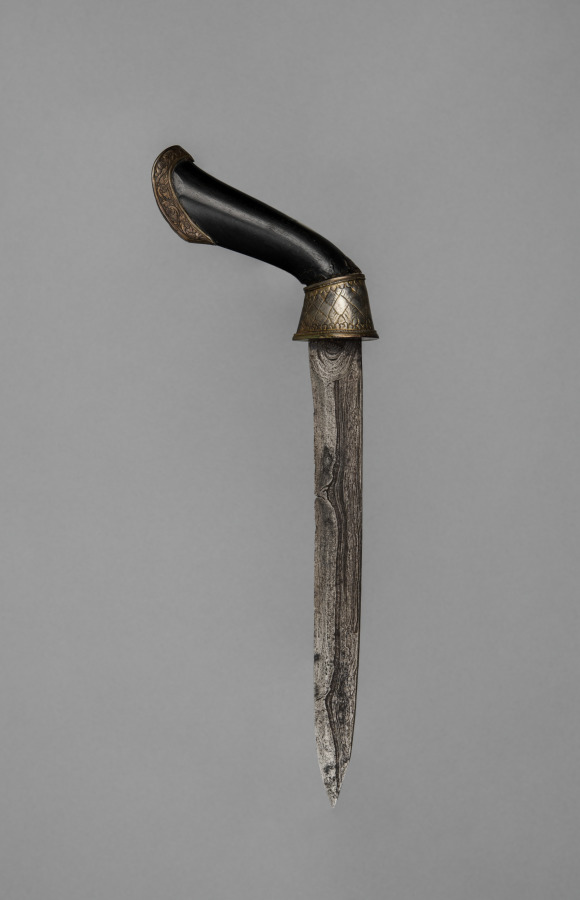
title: Knife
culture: Sri Lanka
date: 1500s–1800s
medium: Blade: damascened steel; handle: wood, bronze, and gilt-silver fittings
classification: Arms and Armor